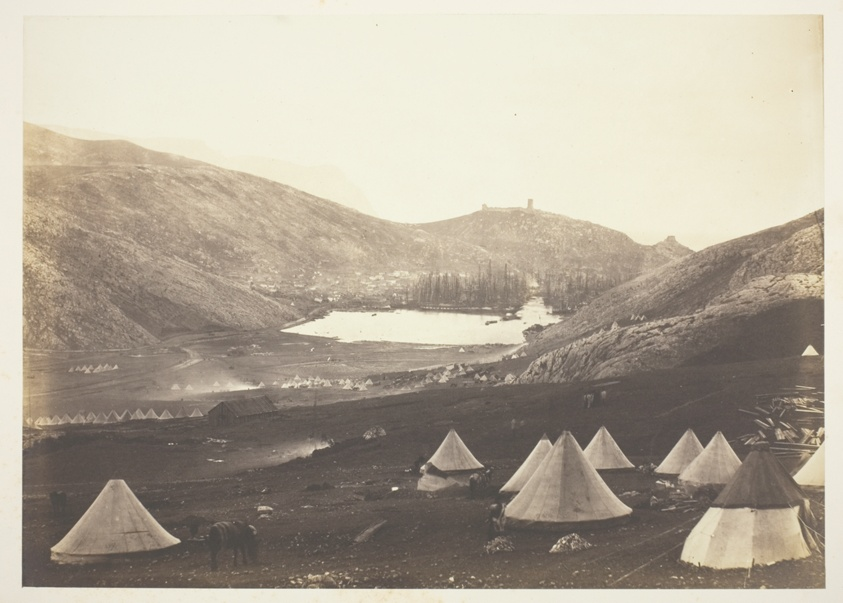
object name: Photograph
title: Balaklava from Guard's Hill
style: 19th century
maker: Roger Fenton (English, 1819–1869)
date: 1855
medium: Salted paper print, from the album "Photographic Pictures of the Seat of War in the Crimea" (1856)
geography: England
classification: salted paper print; photographic process; photography; photograph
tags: Collected by Hugh Edwards